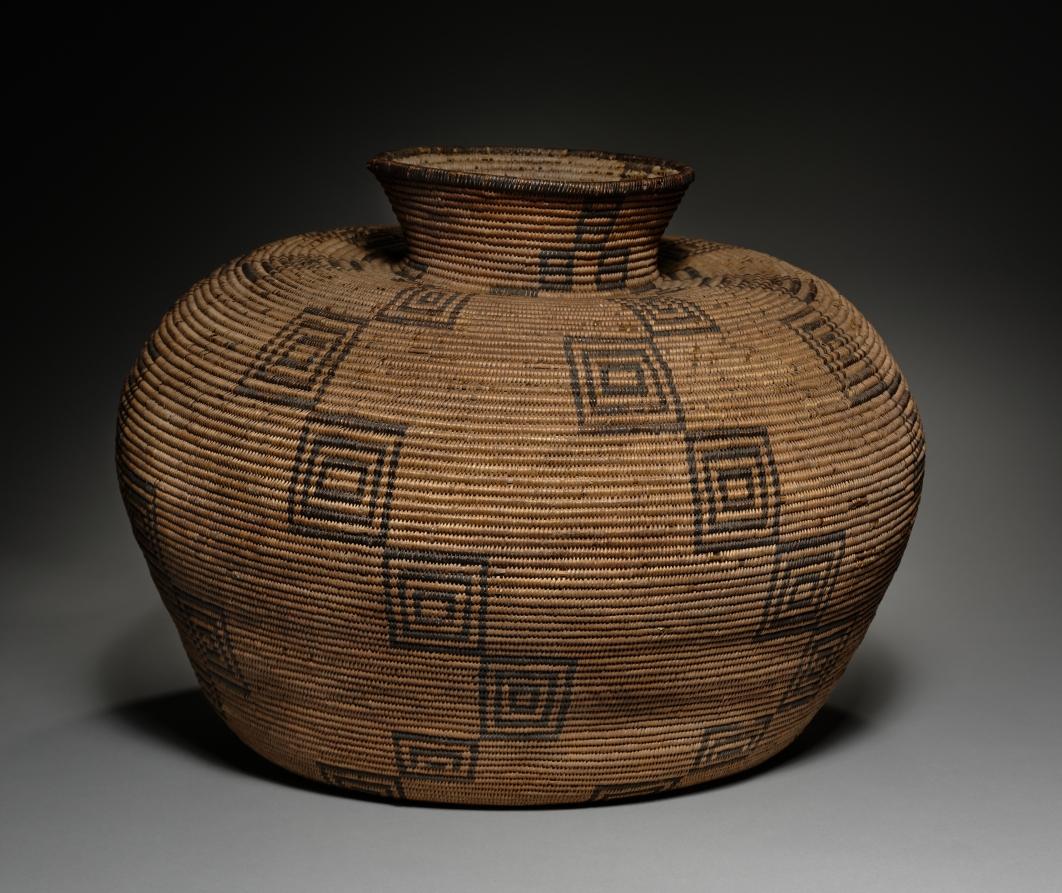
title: Grain Storage Basket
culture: Southwest, White Mountains, Arizona, Apache, 19th century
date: late 1800s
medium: coiled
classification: Basketry